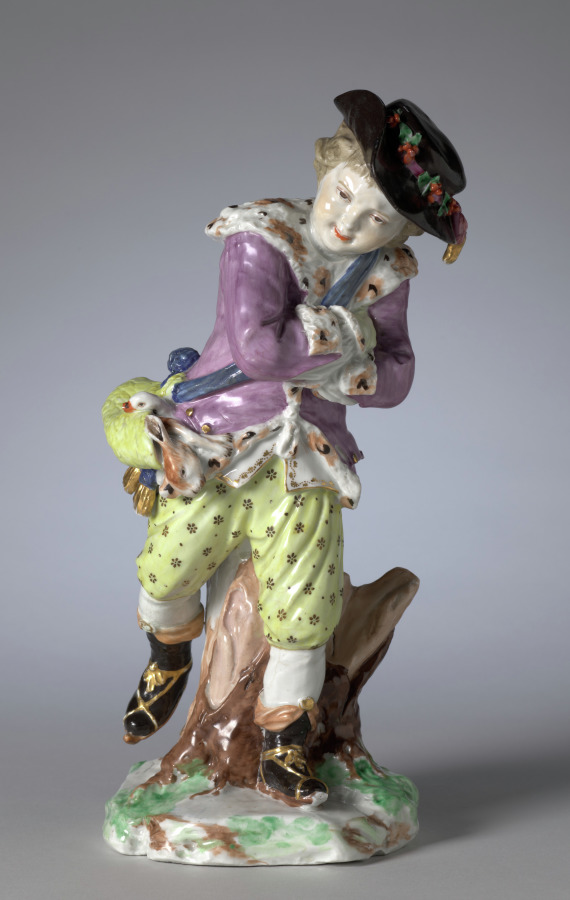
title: Figure of Winter from the Four Seasons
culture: England, Bristol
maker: Bristol Porcelain Factory (British, 1770–81)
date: c. 1775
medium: hard-paste porcelain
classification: Ceramic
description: The modern notion of childhood as a time of innocence and simplicity emerged during the second half of the eighteenth century. This understanding of adolescence led to numerous depictions of children as personifications of the four seasons. Here winter is portrayed as a young boy wearing ice skates, a fur-lined jacket, and a hat adorned with holly branches. In his satchel he carries a goose and rabbit, both of which are commonly hunted in the winter.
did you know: Allegorical figures most often decorated a table during the dessert course, providing amusing subjects for conversation.